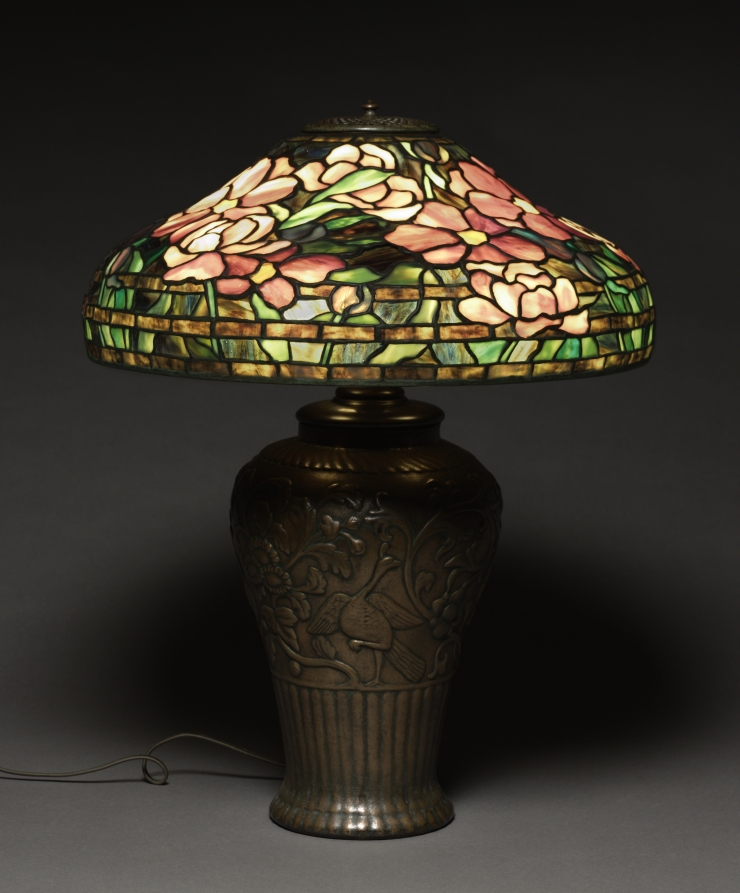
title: Peony Table Lamp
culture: America, New York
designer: probably by Clara Wolcott Driscoll (American, 1861–1944)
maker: Tiffany Studios (United States, New York, 1902–32)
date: c. 1905–15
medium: Leaded glass, bronze, ceramic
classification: Lamp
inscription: Shade impressed: TIFFANY STUDIOS NEW YORK 1475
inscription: Based scratched: BP250 L.C. Tiffany Bronze Pottery Favrile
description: In the 1870s a renewed emphasis on natural landscapes ushered in a generation of cottage gardeners who delighted in planting perennials in large quantities. Louis Comfort Tiffany was among those who championed the lush, sometimes wild-looking displays of varied floral species in the garden at his Long Island estate, Laurelton Hall. Tiffany encouraged his designers to take inspiration from his garden by shipping fresh cuttings almost weekly to his studios. Ohio native Clara Wolcott Driscoll and her team of female designers created floral patterns for lamps and mosaics based on the colorful blooms of spring that became among the most sought after and commercially successful of Tiffany’s production.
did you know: The base of this lamp looks like it is made of metal, but it is really just a ceramic base painted to look like bronze.